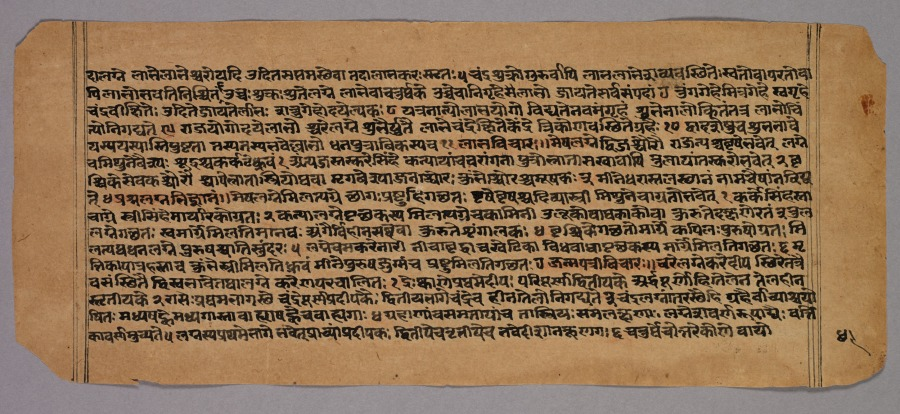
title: Page from the Prasnapradipa, a Hindu Astrology Text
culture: Western India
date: 1500s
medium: ink on paper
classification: Manuscript